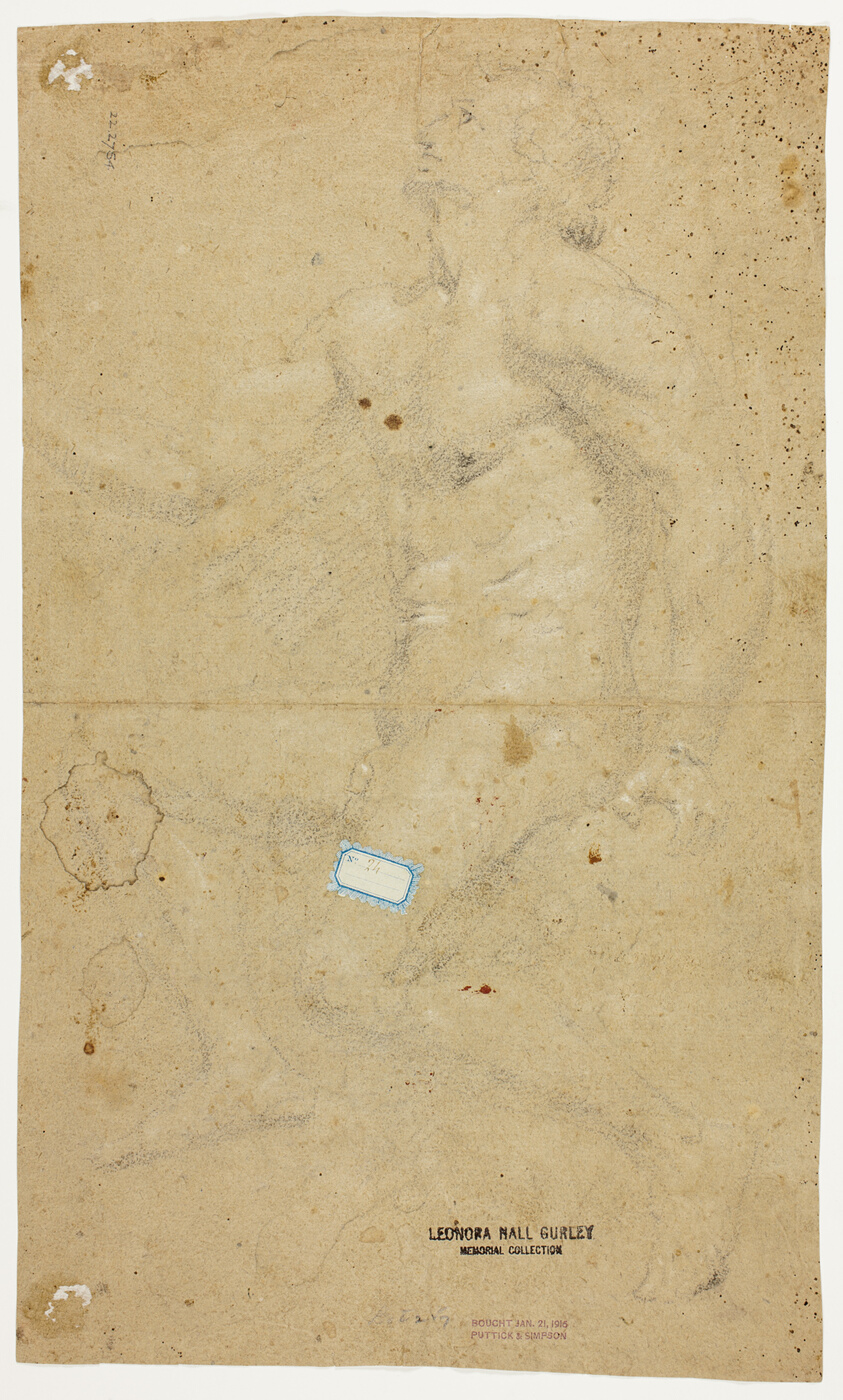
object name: Drawing and Watercolor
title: Staircase and Fountain (recto); Seated Male Nude in Profile to Left, Looking Upward (verso)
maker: Unknown Artist; Italian, 1600-1699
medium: Pen and brown ink, with brush and gray wash, heightened with white gouache (recto), and black chalk, heightened with white chalk (verso), on tan laid paper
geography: Italy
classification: drawings (visual works); prints and drawing; chalk; paper; pen and ink drawings